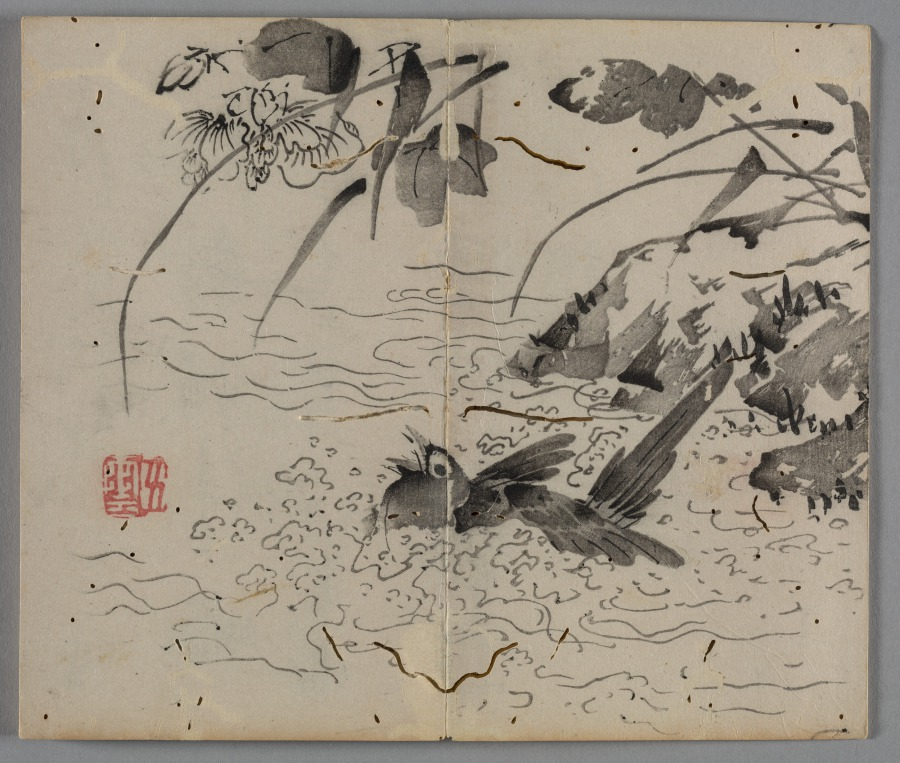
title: Ten Bamboo Studio Painting and Calligraphy Handbook (Shizhuzhai shuhua pu): Birds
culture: China, Qing dynasty (1644-1911)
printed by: Hu Zhengyan (Chinese, c. 1584–1674)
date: 1633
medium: Woodblock-printed book; ink and colors on paper; first edition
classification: Print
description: Color printing reached a level of perfection in the early 1600s, as seen in this Ten Bamboo Studio Collection of Calligraphy and Painting and the Mustard Seed Garden Manual of Painting (printed 1679 and 1701). The painterly quality, precision in registering (aligning) the woodblocks, and harmonious colors made them the most successful color print editions in Chinese history. Both editions were printed and compiled in Nanjing, spread nationwide, and had a great impact on the arts in Japan and Korea.